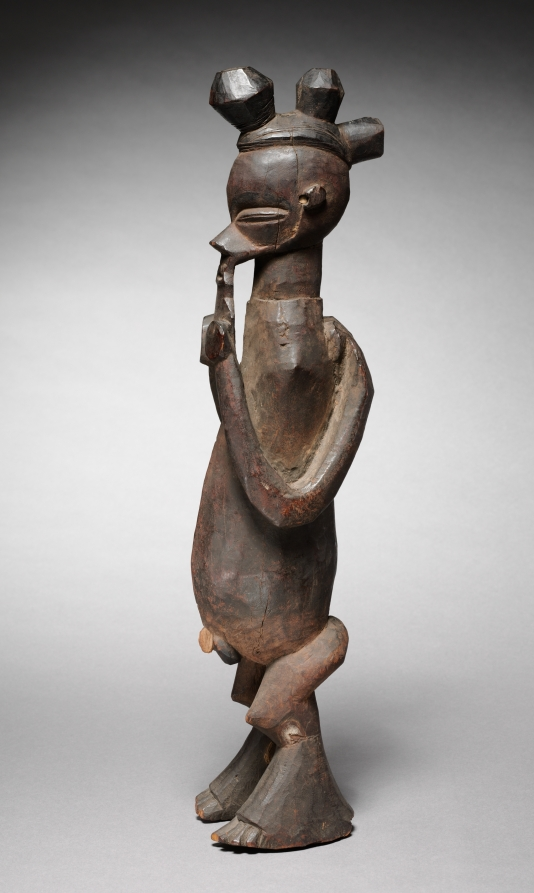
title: Male Figure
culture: Africa, Central Africa, Democratic Republic of the Congo, Yaka-style maker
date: 1900s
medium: wood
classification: Sculpture